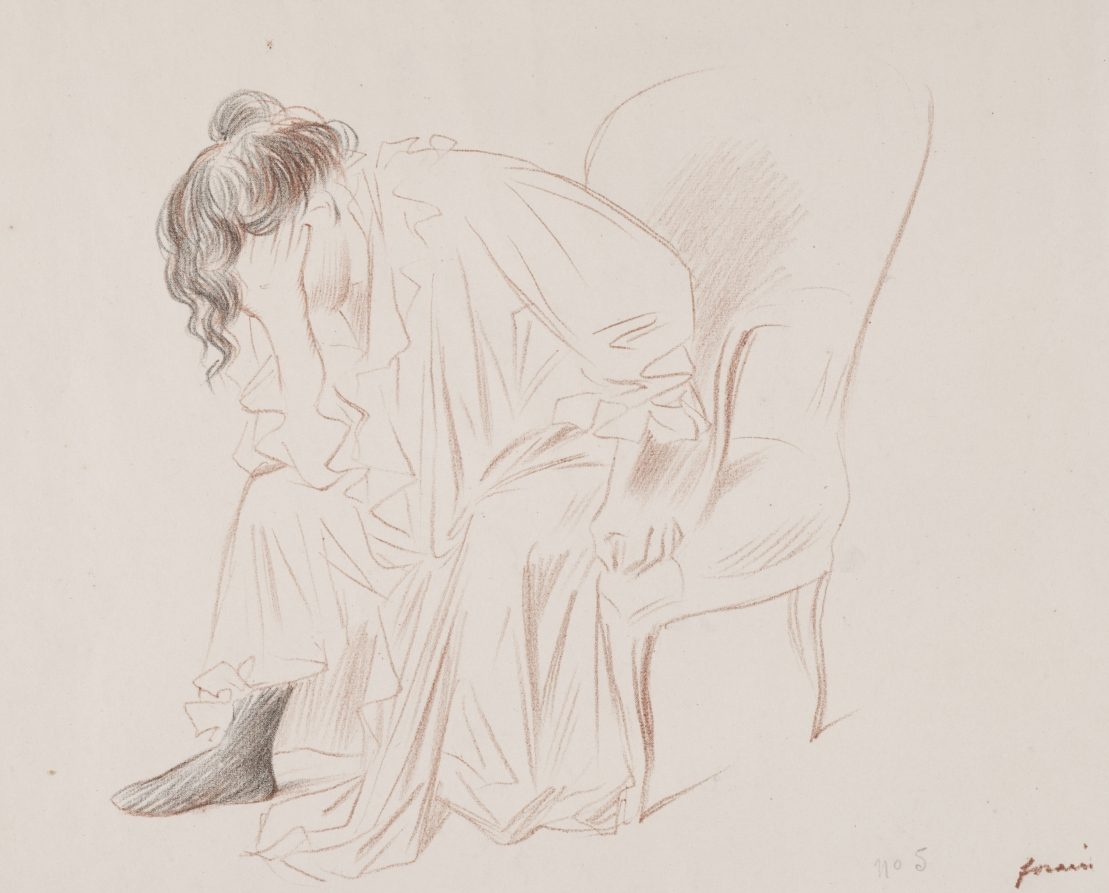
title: Woman Seated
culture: France, 19th century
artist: Jean Louis Forain (French, 1852–1931)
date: c. 1867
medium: lithograph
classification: Print